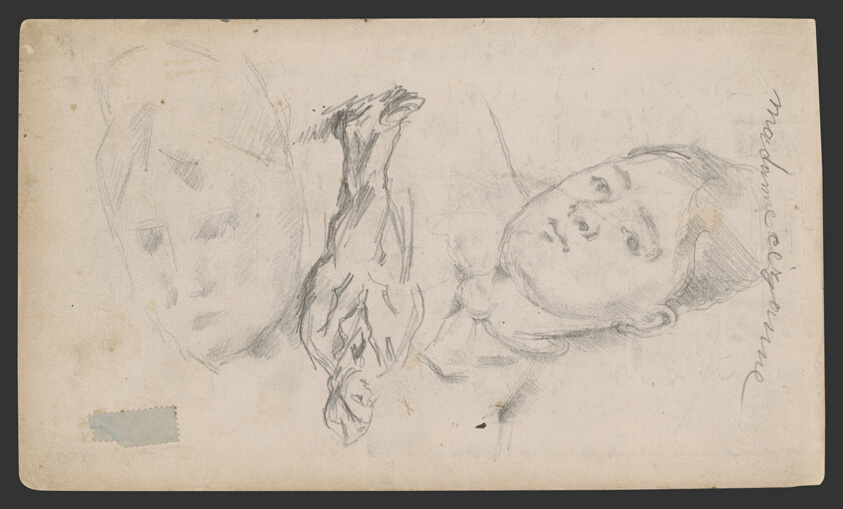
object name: Drawing and Watercolor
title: Sketchbook No. 2 (L'Estaque)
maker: Paul Cézanne; French, 1839-1906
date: 1875–86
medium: Graphite and pen and ink drawings on paper, bound into a book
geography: France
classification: sketchbook; graphite; prints and drawing; paper